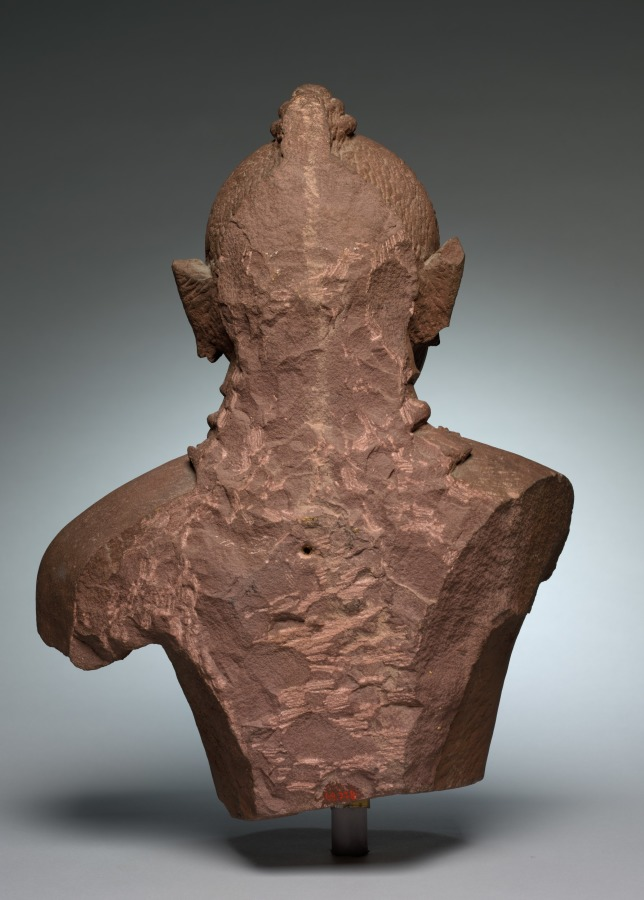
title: Rishabha, the First Jina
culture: Central India, Chandela Dynasty, 9th - 10th Century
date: 800s–900s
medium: stone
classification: Sculpture